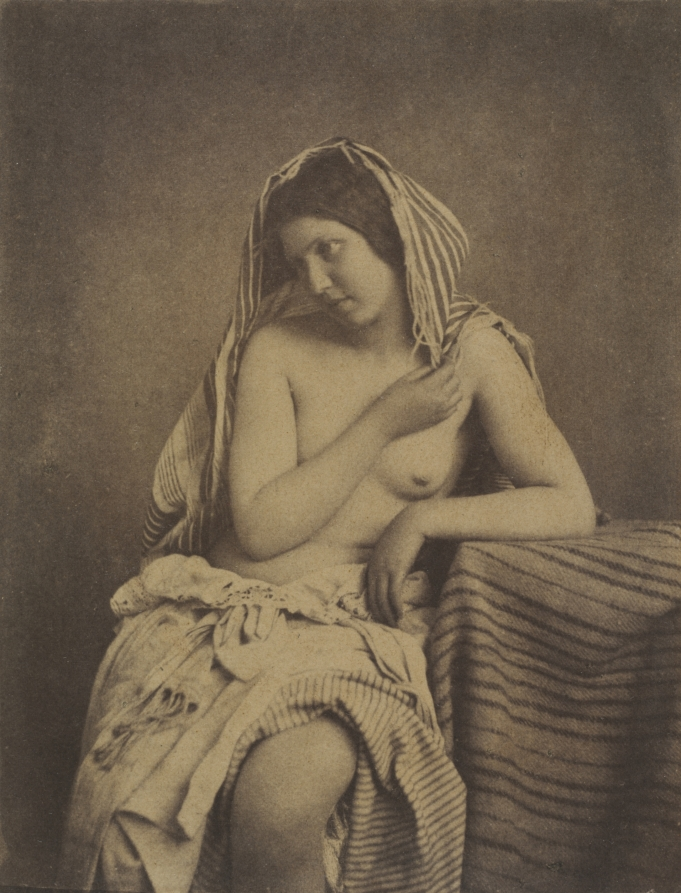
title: Study after Nature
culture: France, 19th century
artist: Julien Vallou de Villeneuve (French, 1795–1866)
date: c. 1853–55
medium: waxed salt print from waxed paper negative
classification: Photograph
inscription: Written in pencil on recto: "1909[G?]"; "nog / ser7"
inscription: in pencil on verso: "2 [circled]"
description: In the early 1850s, despite protests from moralists, photographs of nudes (known as académies) were discreetly produced under the guise of "artist's studies." Among those most skilled at making such studies was Julien Vallou de Villeneuve. A successful painter and lithographer during the 1820s and 1830s before turning to photography in the early 1840s, he created a new repertoire of poses for artists to use as compositional aids. Among his clients was the French realist painter Gustave Courbet (1819–1877).